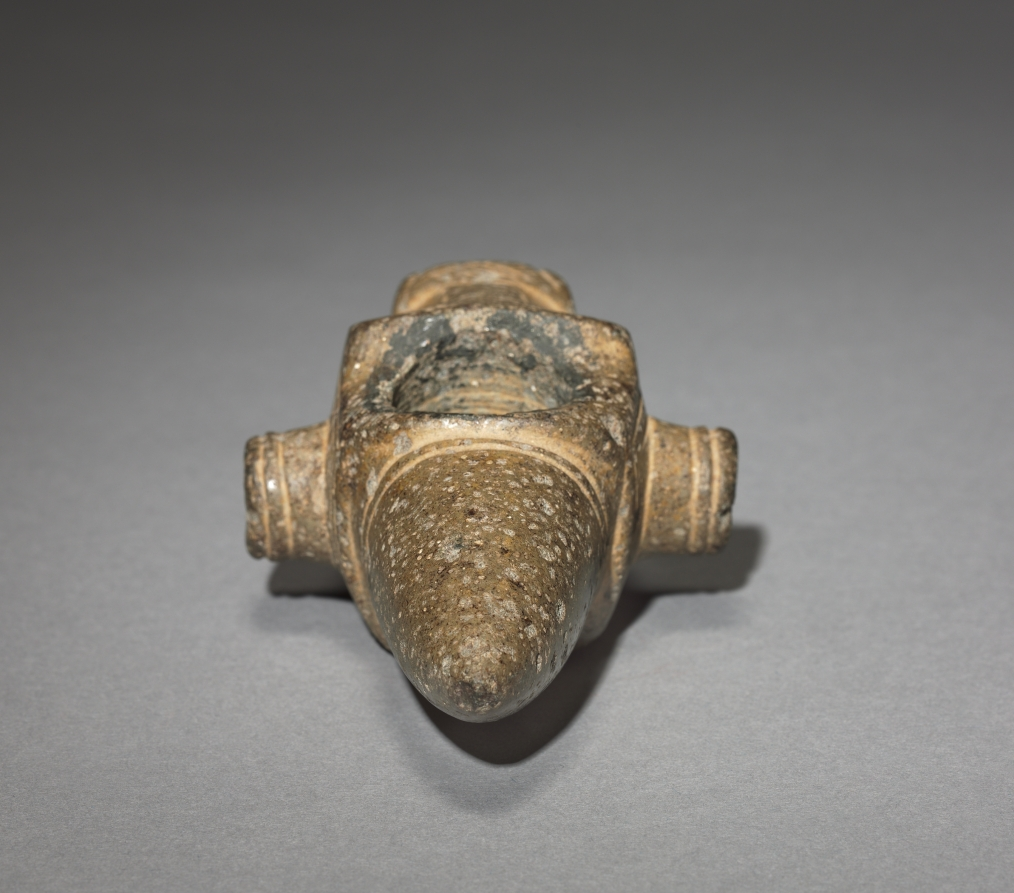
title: Mace Head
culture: Costa Rica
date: 300–500 CE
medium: pecked and polished gray stone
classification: Sculpture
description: Once mounted on wooden shafts, elaborately shaped mace (club) heads like this one probably were not used as weapons. Rather, they could have served as emblems of chiefly authority, group insignia, the heads of ceremonial weapons, or all three. They eventually were placed in elite graves. The back-curled nose on this example may refer to a crocodile or caiman.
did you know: In ancient Costa Rica, it was believed that the world rested on the back of a crocodile.